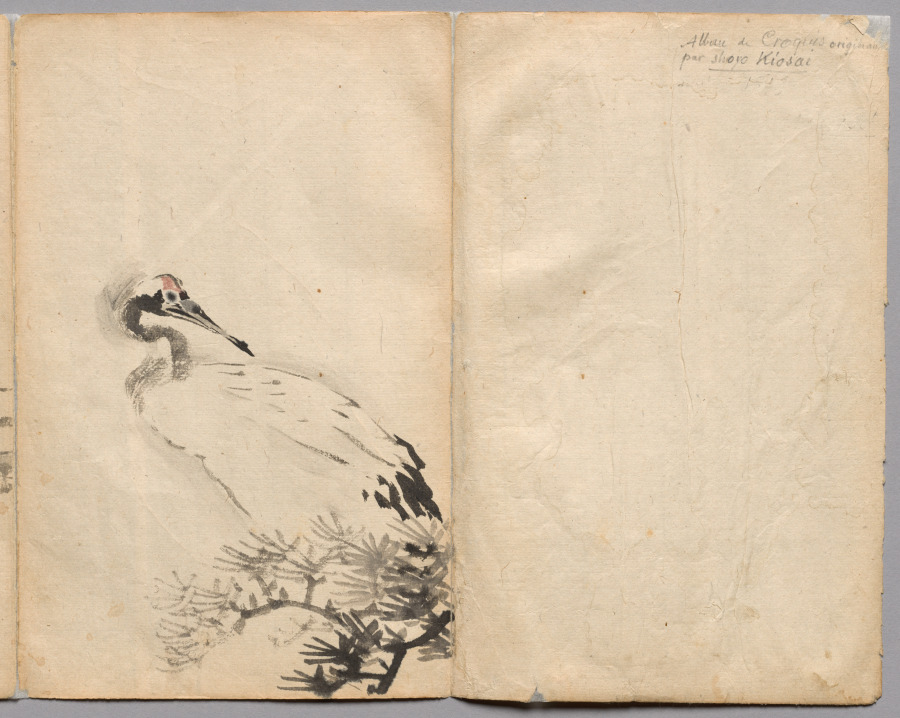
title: Crane from Sketch Album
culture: Japan, Edo period (1615–1868) to Meiji period (1868–1912)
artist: Kawanabe Kyōsai (Japanese, 1831–1889)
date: mid- to late 1800s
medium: Accordion-style book of 26 double-leaves; ink and color on paper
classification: Bound Volume